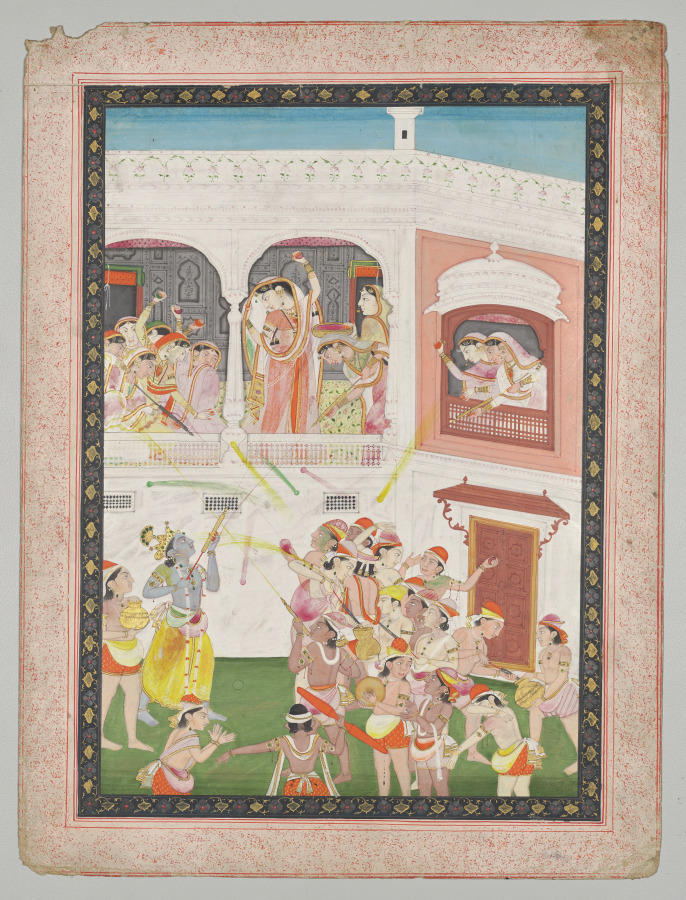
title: Radha and Hindu God Krishna celebrating the festival Holi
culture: Northern India, Pahari kingdoms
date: c. 1800–1810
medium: Gum tempera, ink, and gold on paper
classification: Painting